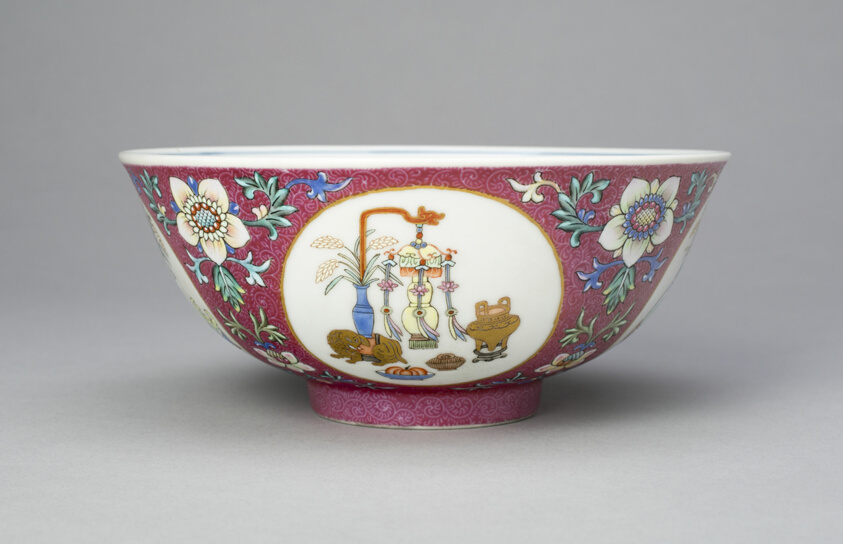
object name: Vessel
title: Ruby-Ground Medallion Bowl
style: Chinese (culture or style)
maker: China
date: Qing dynasty (1644–1911), Daoguang reign mark and period (1821–1850)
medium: Porcelain painted in underglaze blue and overglaze enamels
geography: China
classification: bowl; porcelain; dish (vessel); ceramics; asian art; vessel